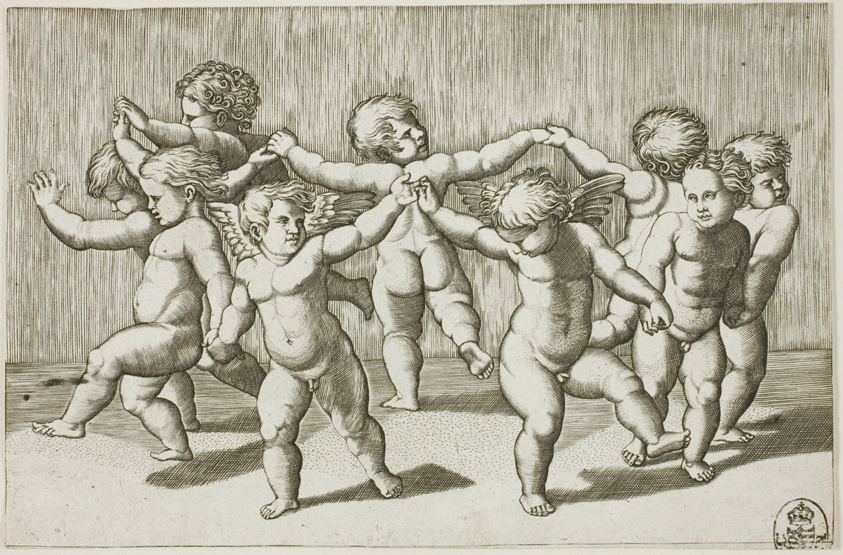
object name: Print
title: Dance of Cupids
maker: Marcantonio Raimondi (Italian, c. 1480-1534)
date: 1517/20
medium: Engraving printed in black on paper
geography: Italy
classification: engraving; print; prints and drawing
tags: children